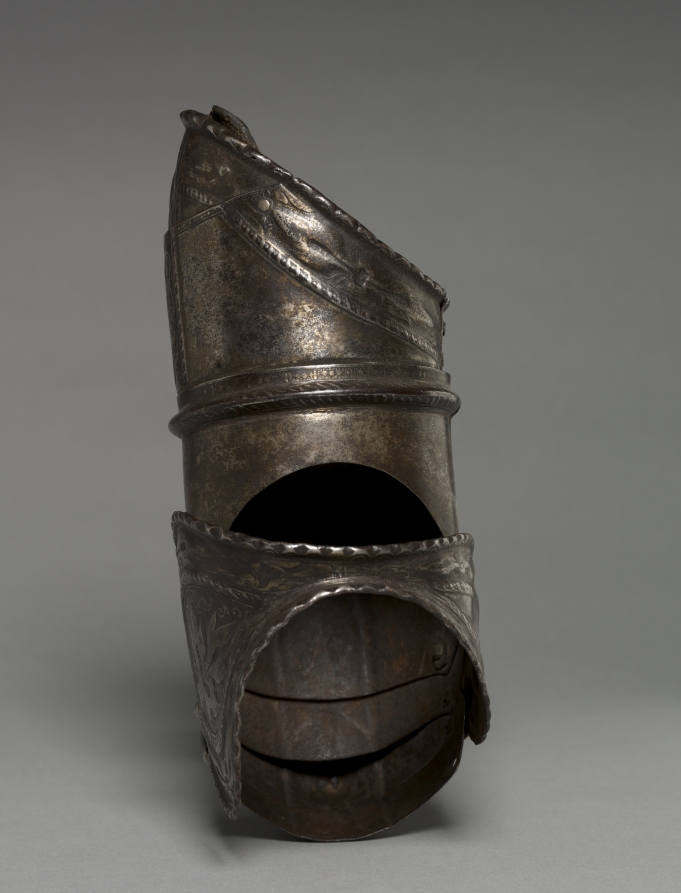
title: Right Arm Elements from a Boy's Armor (Rerebrace with Couter)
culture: Germany, Augsburg, mostly 16th Century (some modern)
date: c. 1560 (some modern)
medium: etched and lightly embossed steel with traces of gilding, leather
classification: Arms and Armor